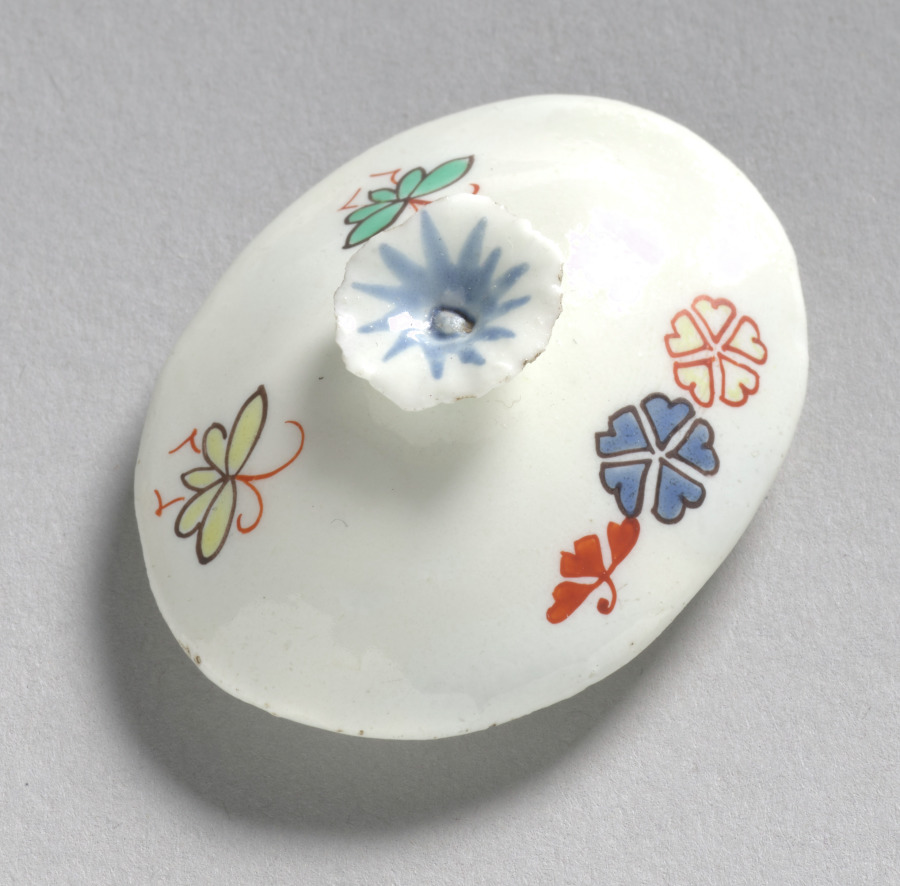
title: Teapot (cover)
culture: France, Chantilly, 18th century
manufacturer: Chantilly Porcelain Factory (French)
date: c. 1730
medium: soft-paste porcelain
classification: Ceramic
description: The pieces composing this individual tea set are entirely typical of Chantilly soft-paste porcelain in the Kakiemon style. Both the form and decoration of these pieces were inspired by Japanese prototypes. The use of knobs in the form of trumpet-shaped blossoms is characteristic of Chantilly wares.